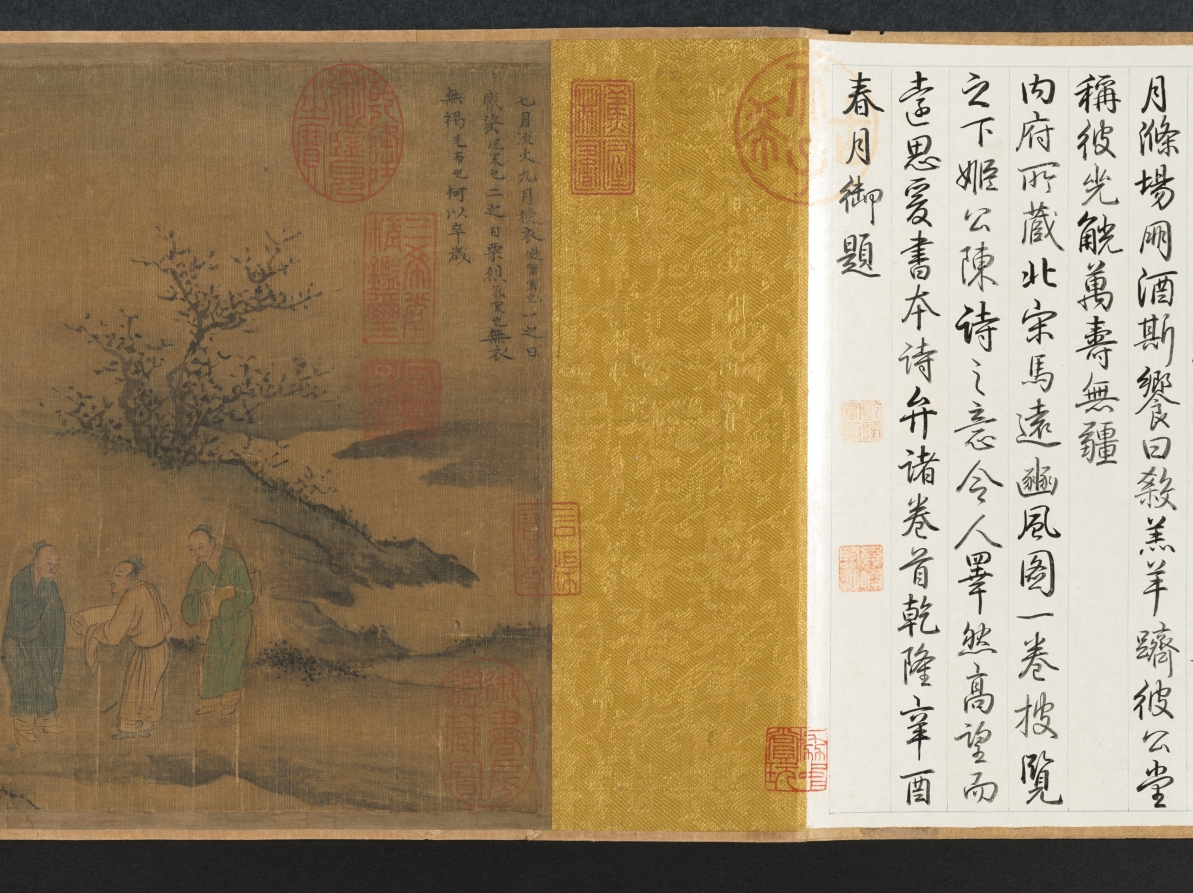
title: "Seventh Month" from the Odes of Bin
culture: China, Southern Song dynasty (1127-1279)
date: 1200s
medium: Handscroll; ink and color on silk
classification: Painting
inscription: Colophons: 1. [on the frontispiece] by the Qianlong emperor (dated 1741). 2. by Lu Wan (dated Zhengde dingchou, 1517). 2. by the Jiaqing emperor (dated 1807).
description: According to Confucian thought, the ruler looks after the well-being of his people which involves agricultural activities. Seventh Month from the ancient Odes of Bin in the Shijing (Book of Poetry) describes occupations throughout the year, including plowing, harvesting, hunting, making clothes, and observing rituals. The earliest illustrations of these Odes accompanied by text were commissioned by Southern Song emperor Gaozong (reigned 1127–1162). As the lower Yangzi delta had become the new seat of government, Gaozong had sets of these illustrations produced by court artists to revive the dynasty and convince the Confucian officialelite of his legitimacy to rule.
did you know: The Odes of Bin appears in the classic Shijing (Book of Poetry), an anthology of more than 300 poems, folk songs, and ceremonial hymns that were originally chanted to music.